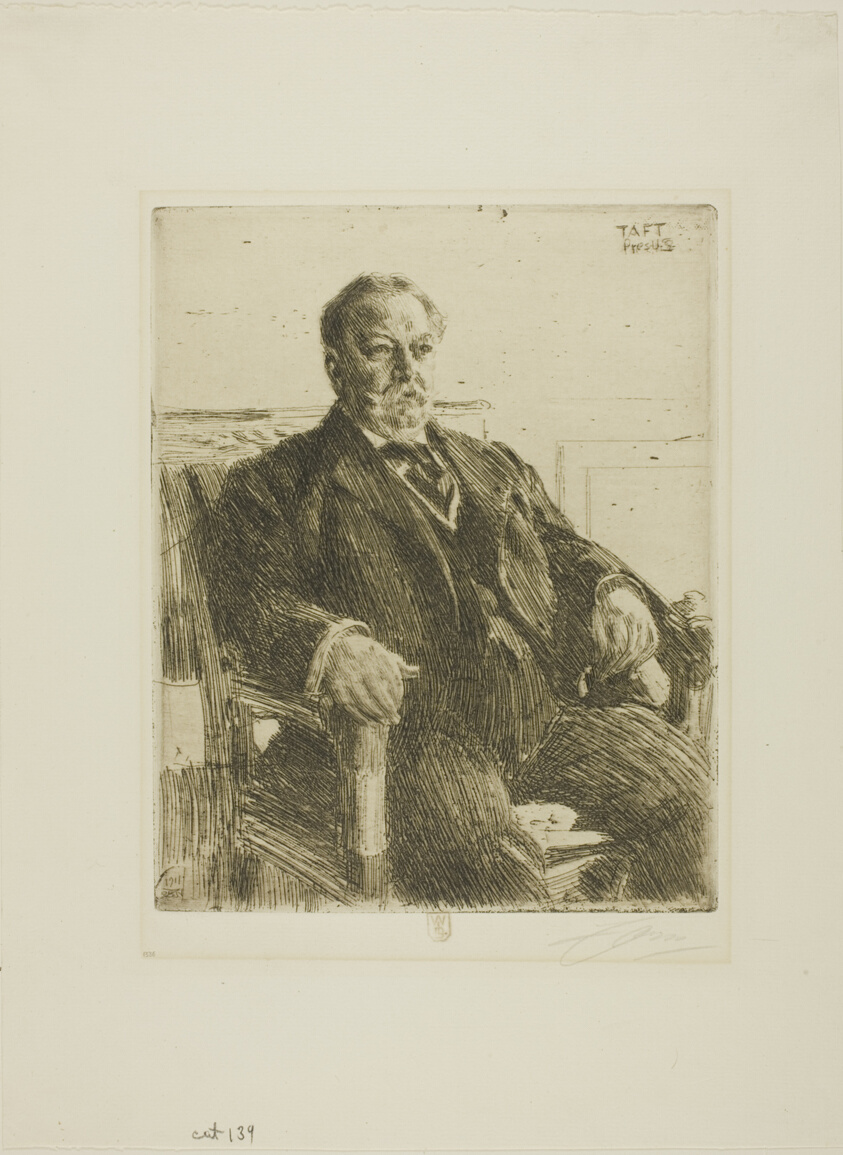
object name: Print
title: President William H. Taft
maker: Anders Zorn (Swedish, 1860-1920)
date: 1911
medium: Etching on ivory laid paper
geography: Sweden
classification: etching; print; prints and drawing